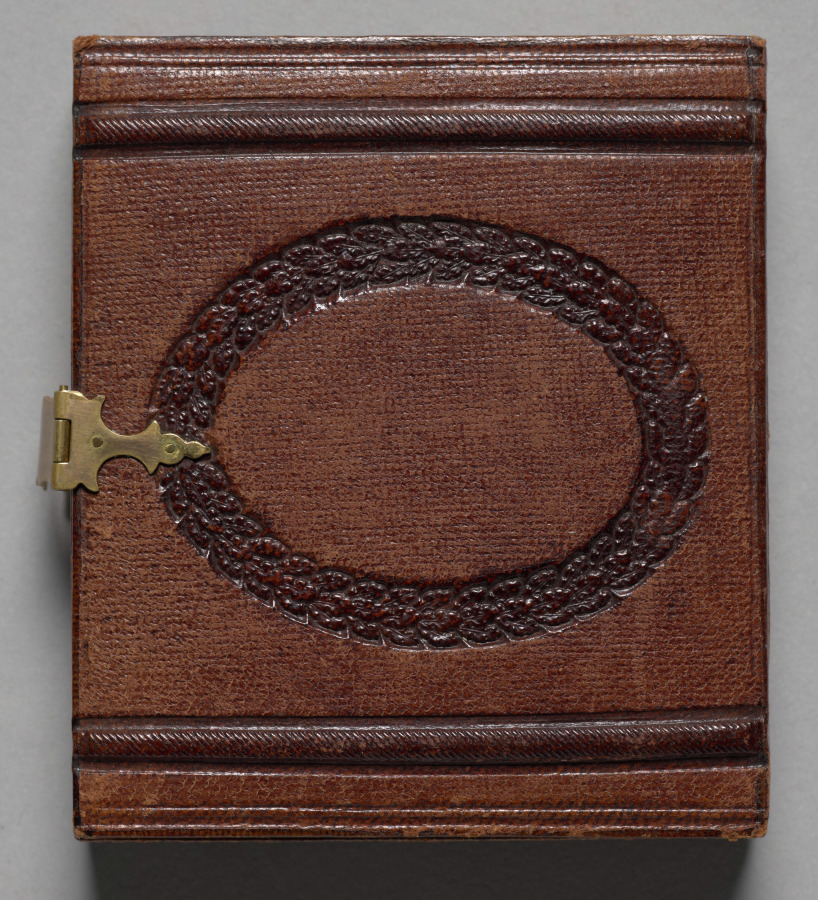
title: Seated boy in tasseled cap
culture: America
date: c. 1858–61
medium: ambrotype, sixth plate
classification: Photograph